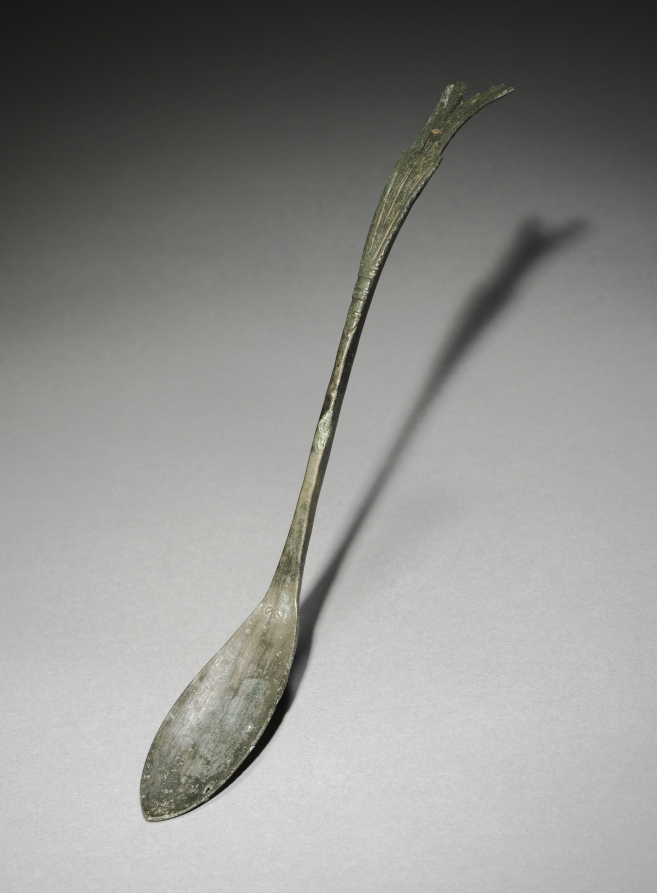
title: Spoon with Fish-Tail Design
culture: Korea, Goryeo dynasty (918–1392)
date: 918–1392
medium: bronze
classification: Metalwork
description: Many of Goryeo period spoons like this one feature a curved handle that splits into a jagged fishtail design. This fishtail design is not unique to Korea; it was also widely used in the area under the rule of two non-Han Chinese states: Liao (907–1125) and Jin (1115–1234). These seemingly ordinary objects testify to exciting material interactions between the Goryeo dynasty and non-Han Chinese northern states, which were often omitted from the official records.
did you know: Bronze spoons are the most common burial item. Scholars have proposed that toward the end of the 1300s, Koreans enjoyed meat-based soups more than any other dishes, explaining why spoons became common household items as well as burial goods.